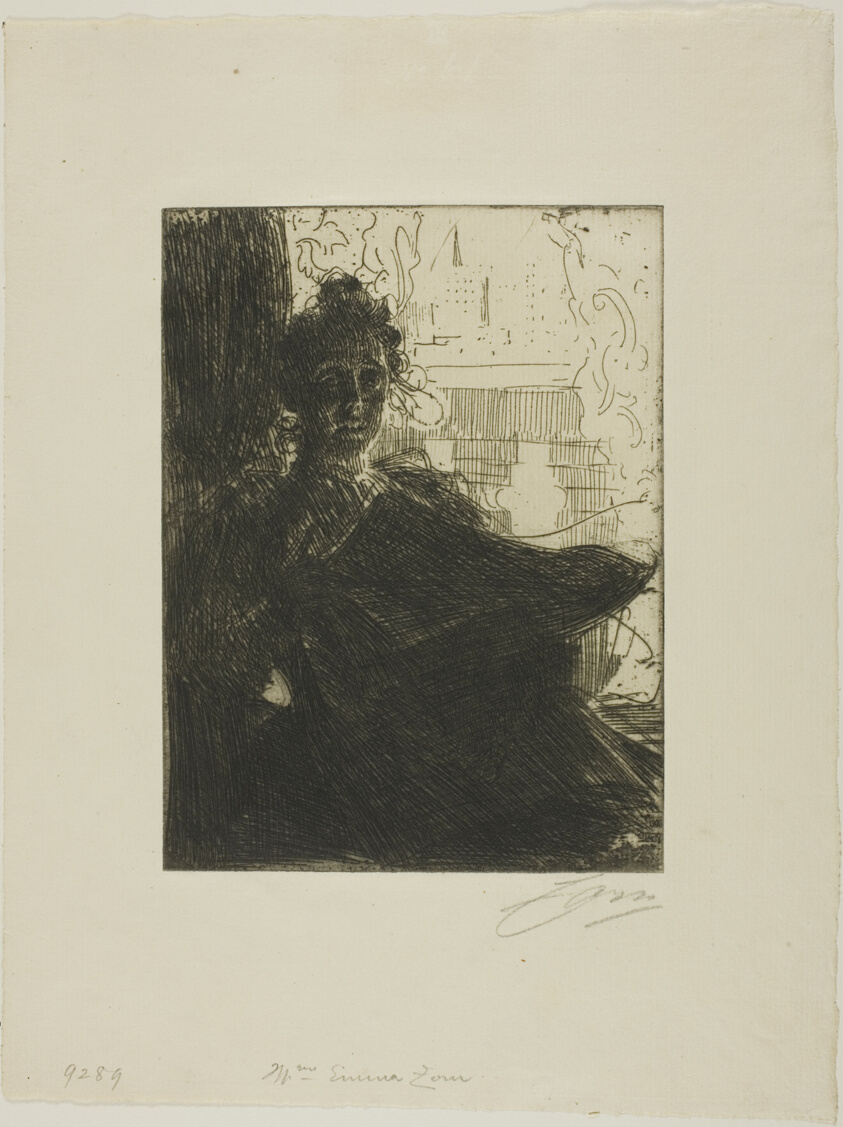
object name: Print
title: Mrs. Emma Zorn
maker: Anders Zorn (Swedish, 1860-1920)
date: 1900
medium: Etching on ivory laid paper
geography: Sweden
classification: etching; print; prints and drawing